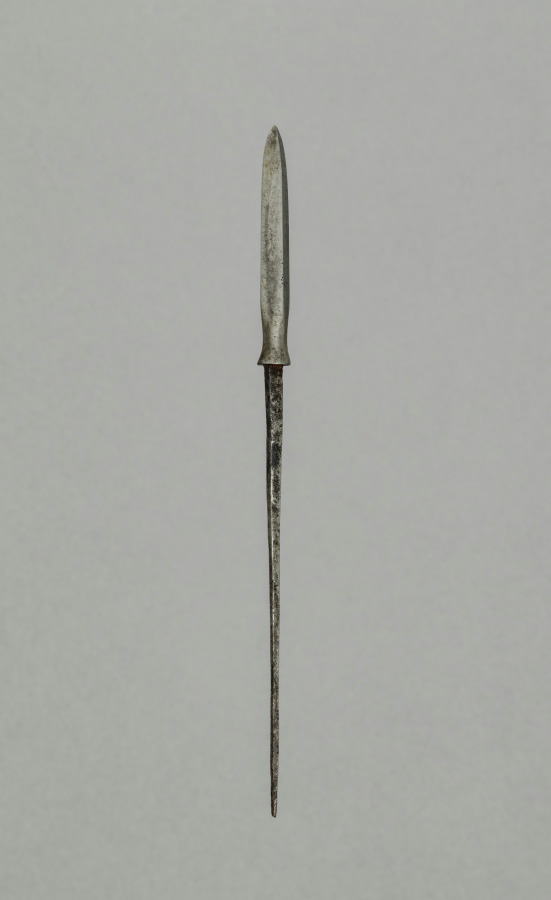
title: Arrow Point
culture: Japan, Edo period (1615–1868)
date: 1700s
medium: steel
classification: Arms and Armor